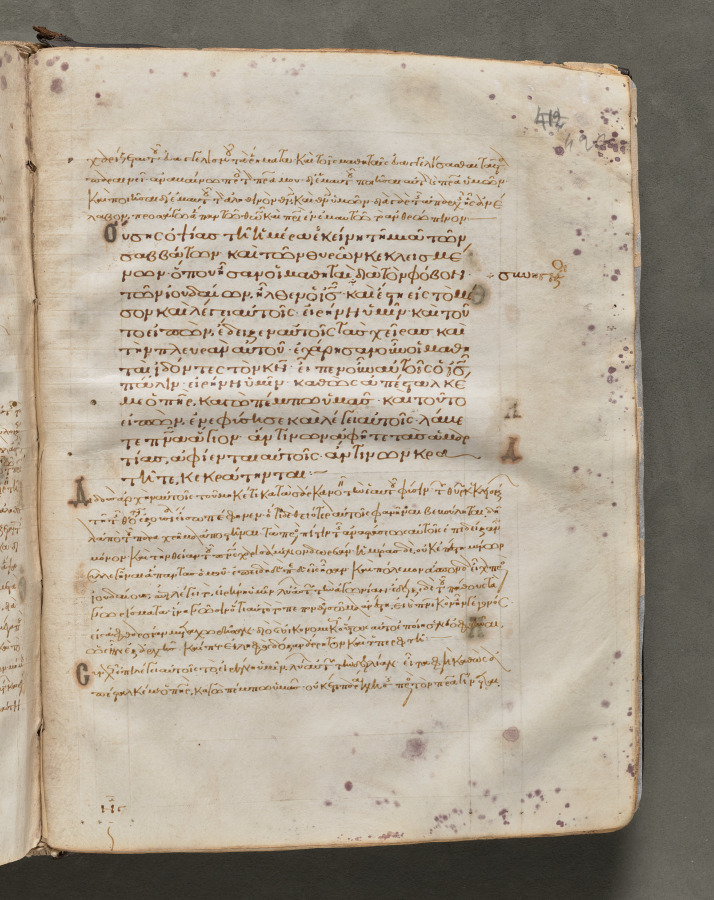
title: Text, folio 420 (recto), from a Gospel Book with Commentaries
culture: Byzantium, Constantinople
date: c. 1000–1100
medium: ink, tempera, and gold on vellum; leather binding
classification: Bound Volume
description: Each of the four gospels in this book opens on a page with brilliantly illuminated borders depicting the author of the text as well as birds—principally peacocks, symbols of the immortality of the soul—and fountains, representing the fountain of life and the salvation of the soul. This volume consists of 428 leaves with texts in Greek. Its level of sophistication suggests that it was probably written and decorated in a monastery in Constantinople.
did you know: Gospel books were carried in procession through Byzantine churches.